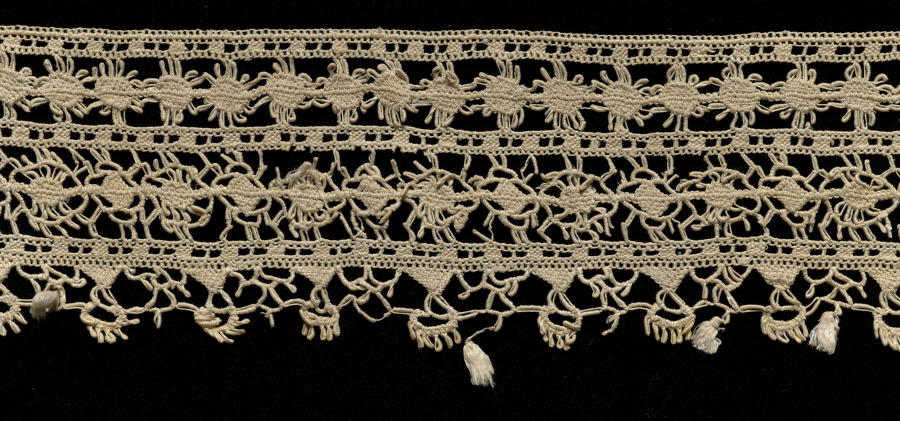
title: Lace Collar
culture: Italy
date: 1600s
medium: Knotted lace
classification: Lace